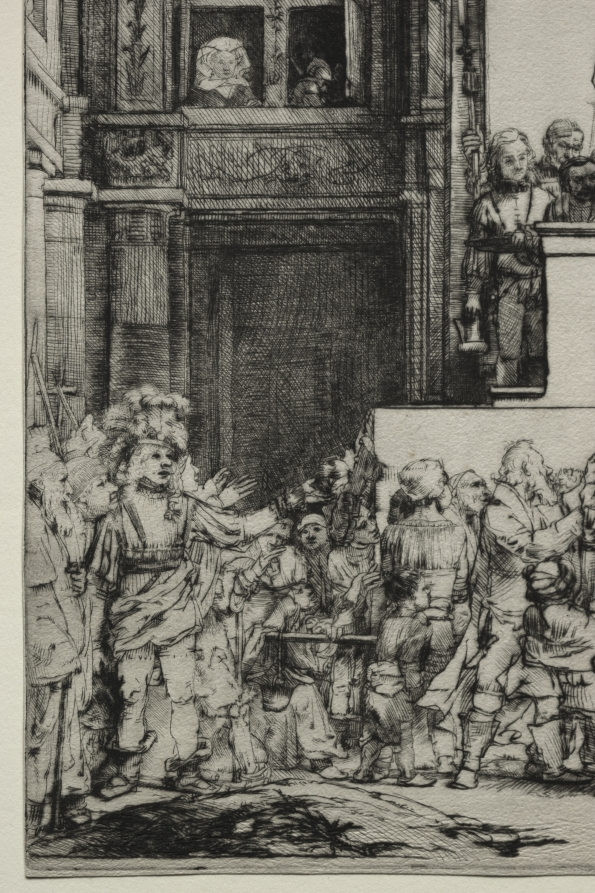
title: Ecce Homo. Christ Presented to the People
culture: Netherlands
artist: Rembrandt van Rijn (Dutch, 1606–1669)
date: 1655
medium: drypoint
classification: Print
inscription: Recto, upper left, in graphite: 79; lower left: FPS. Verso, in purple ink: Prince of Liechtenstein or Colnaghi for Liechtenstein stamp; in black ink, Zinser stamp, castle tower (rook chess piece); along side, in graphite: No. 36; along top: (illegible) name; upper left, in graphite: No 79 P(?) G (?) La Second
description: Rembrandt was an experimental and innovative printmaker and the first to execute works in pure drypoint on this monumental scale. Drypoint produces blurred lines and rich, velvety shadows, but these effects are lost as the plate wears. A limited number of rich impressions exist like this fine example of the fifth state, which demonstrates how Rembrandt redefined the expressive potential of printmaking. Rembrandt’s habit of drawing from life made him a keen observer of behavior and body language, endowing his biblical scenes with a human dimension and veracity not seen previously. The throng in Christ Presented to the People represents a cross section of the population and reflects the pictorial tradition that common humanity condemned Christ. Large areas of the imposing building, symbolizing the crushing weight and authority of the state, remain unworked so that blank white paper seems radiant in contrast to rich black shadows.